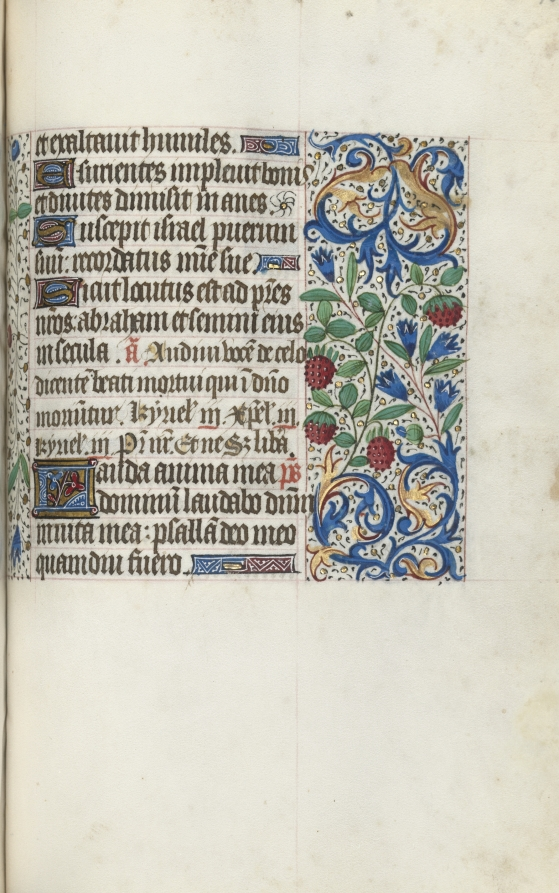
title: Book of Hours (Use of Rouen): fol. 108r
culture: France, Rouen, 15th century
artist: Master of the Geneva Latini (French, active Rouen, 1460–80)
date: c. 1470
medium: ink, tempera, and gold on vellum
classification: Bound Volume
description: In the late 1400s and early 1500s Rouen was an established and important center of book production. The city’s cathedral had a wealthy chapter that spent large sums of money to commission books and to maintain its extensive library. The stationers and booksellers would have likely been concentrated in or near the cathedral precinct. This artist, named after a manuscript now in Geneva, was Rouen’s principal illuminator during the second half of the 1400s.